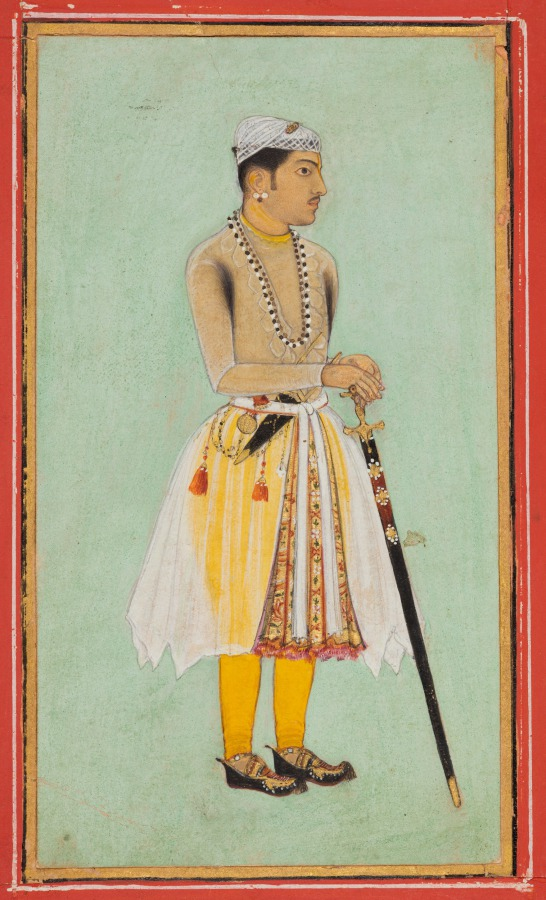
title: Portrait of Prince Sur Singh Rathor of Bikaner (1594–1631)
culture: Northwestern India, Rajasthan, Rajput Kingdom of Bikaner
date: 1611–13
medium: Gum tempera and gold on paper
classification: Painting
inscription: inscribed on the recto nagari number 8. Inscribed on the verso ‘kuṃvara sūra siṃha jī’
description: A young prince stands against a light blue backdrop, dressed in white translucent muslin jama (belted tunic) and yellow trousers. He has a dagger safely tucked in his sash while he holds a long straight sword encased in a black sheath. Religious markings (tilakas) on his forehead, neck, and ear indicate that he was a follower of the Hindu god Vishnu, who was popular among the royal houses of Rajasthan.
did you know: A coin purse hangs by a gold chain from his belt.